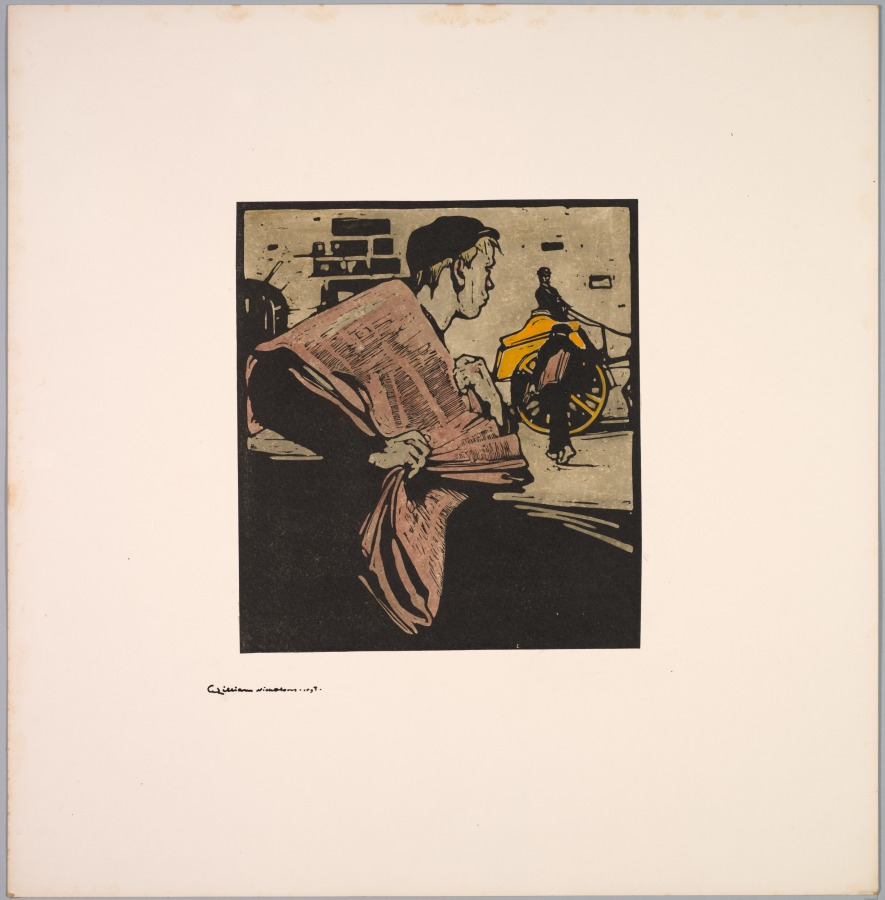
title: London Types: News-boy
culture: England, 19th century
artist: William Nicholson (British, 1872–1949)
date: 1898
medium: woodcut hand-colored with watercolor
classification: Print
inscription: lower left margin, in black ink: William Nicholson - 1898 -